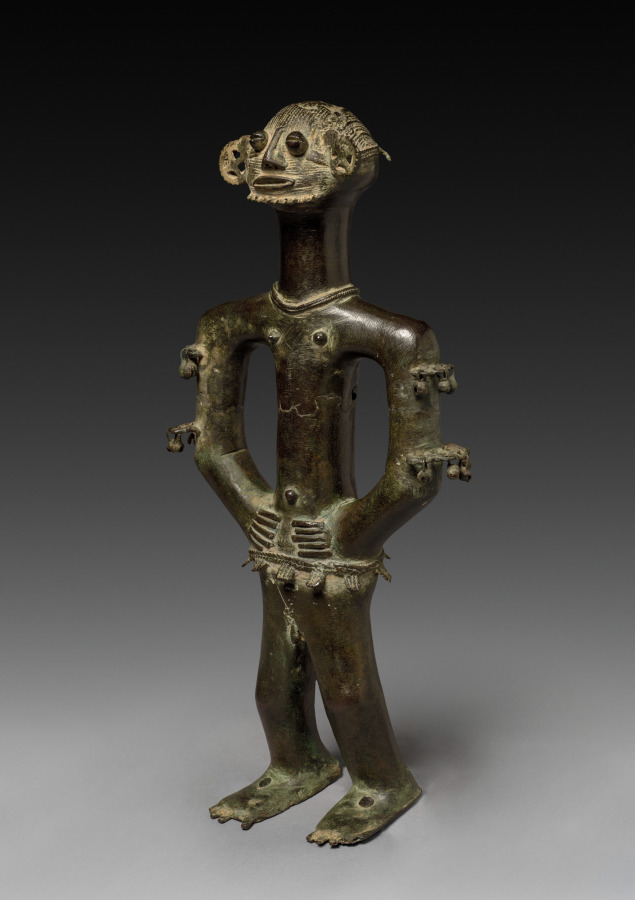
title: Male figure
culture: Africa, West Africa, Nigeria, Benue River Valley, Unidentified maker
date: probably 1800s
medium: Copper alloy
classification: Sculpture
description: Realized in a very distinctive style using the lost-wax method, this figure’s cultural origin and function is limited because it was removed from Nigeria during that country’s turbulent civil war of the late 1960s. Perhaps it was once part of an altar or shrine dedicated to a guardian or tutelary spirit. Connotations of prestige and wealth may explain why copper-alloy objects were diffused across vast territory and inherited over many generations.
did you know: Figurative copper-alloy objects like this sculpture point to intense trade and the circulation of people, goods, and technologies in the Benue River Valley, resulting in a highly cosmopolitan society.